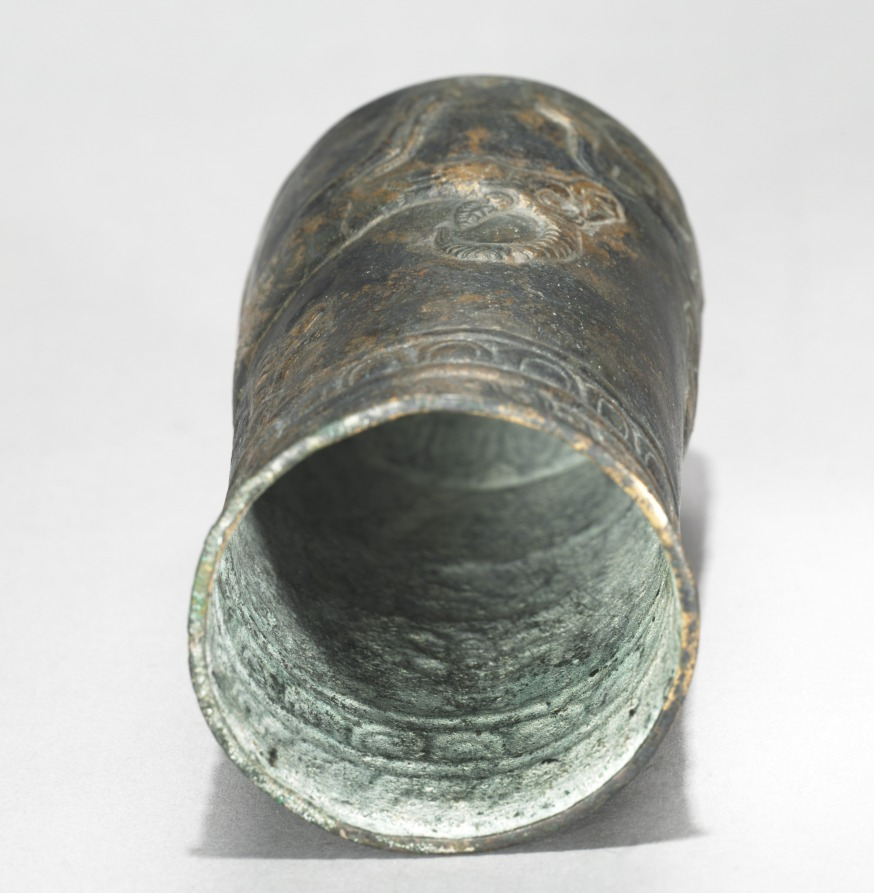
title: Button-Based Situla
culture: Iran, Luristan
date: 900–700 BCE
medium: bronze, repoussé, punched, incised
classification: Metalwork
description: The metalworkers of Luristan provided the Assyrian empire with elaborate bronze ornaments and vessels. These two situla are decorated symmetrically---one with ibexes drinking from an overflowing water jar; the other, with sphinxes.